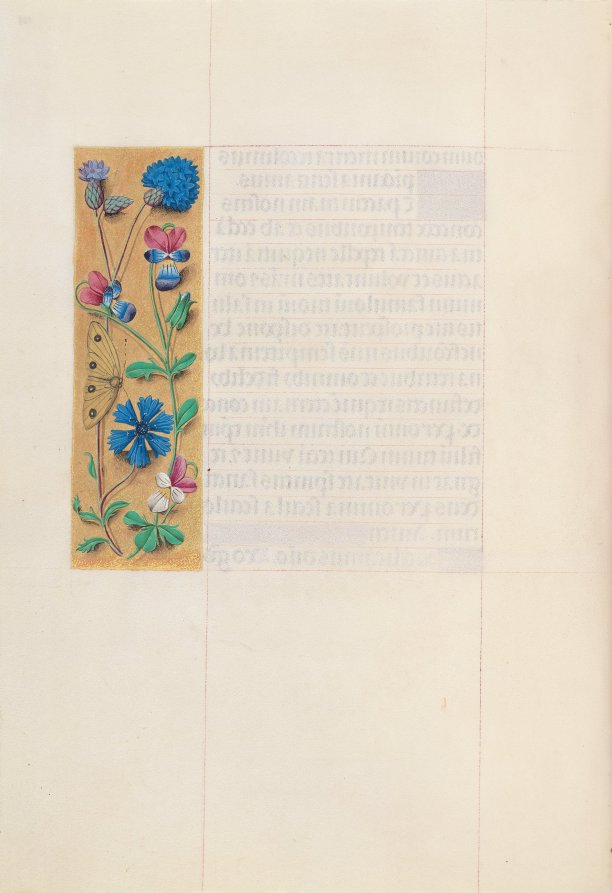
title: Hours of Queen Isabella the Catholic, Queen of Spain: Fol. 153v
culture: Flanders, Ghent and Bruges, late 15th century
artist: Master of the First Prayerbook of Maximillian (Flemish, c. 1444–1519)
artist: and Associates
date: c. 1500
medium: ink, tempera, and gold on vellum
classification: Bound Volume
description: This manuscript was illuminated by a circle of at least five highly organized manuscript painters active in the Flemish cities of Ghent and Bruges. The principal illuminator was Alexander Bening, who painted the majority of the book's miniatures. Manuscripts produced by this circle of artists are renowned for the decoration of their borders, which typically feature a rich variety of realistically-painted flowers, birds, and butterflies. This prayer book, called a book of hours, was intended not for a cleric, but for the private devotions of a lay person-in this case, Isabella the Catholic, Queen of Spain (1451-1504). Isabella's coat of arms embellishes the book's frontispiece. It is unlikely that the book was commissioned by the Queen herself; rather, she probably received it as a diplomatic gift from someone courting her patronage, perhaps Cardinal Francisco Jimenez de Cisneros. A Franciscan friar, Jimenez was dependent upon Isabella for his advancement, first to the post of Queen's confessor in 1492, and then to Archbishop of Toledo in 1495.